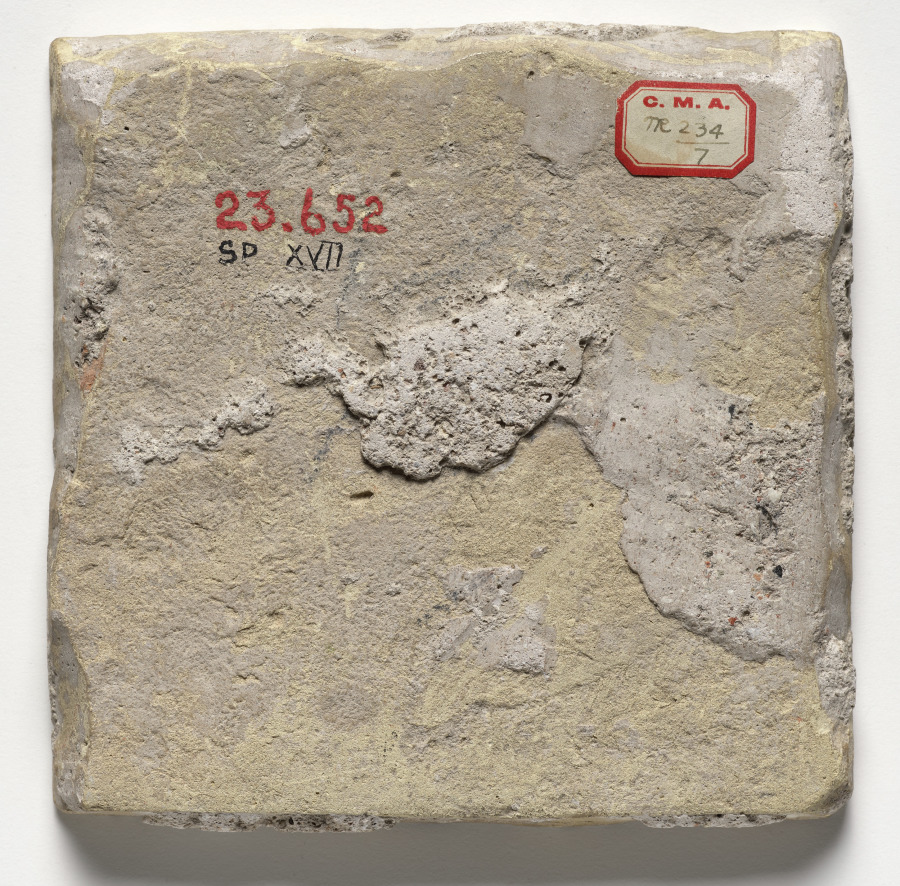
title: Wall Tile–Hunter with Rifle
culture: Spain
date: c. 1600s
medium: glazed ceramic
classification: Ceramic